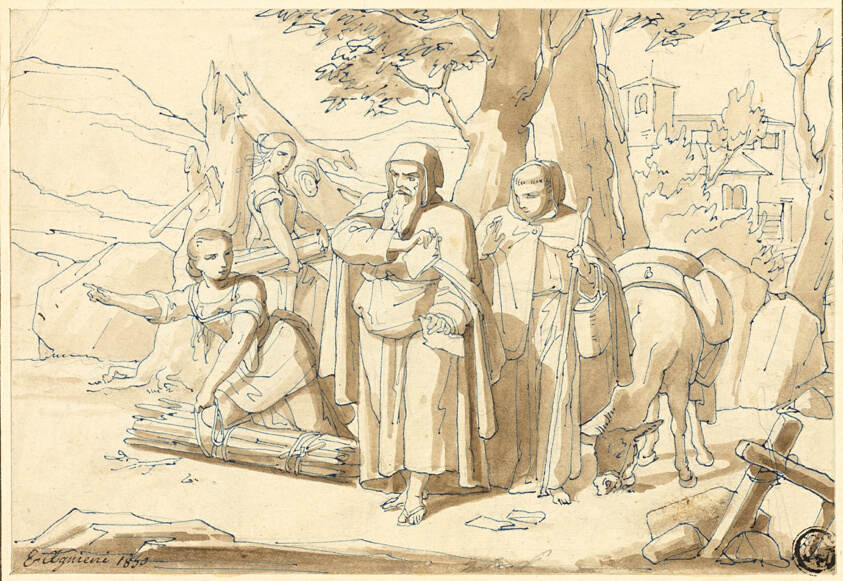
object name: Drawing and Watercolor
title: Peasant Woman Giving Directions to Monks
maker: Eugenio Agneni (Italian, 1819-1888)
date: 1850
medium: Pen and blue ink, with brush and brown wash, with traces of graphite, on cream wove paper, laid down on cream wove paper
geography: Italy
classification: pen and ink drawings; drawings (visual works); prints and drawing